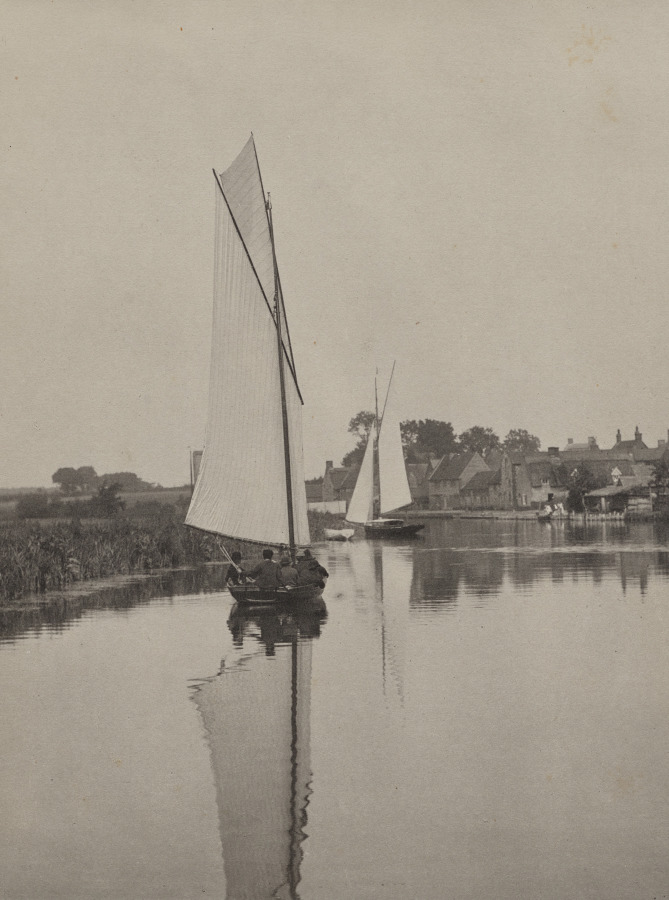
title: The Village of Horning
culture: England , 19th century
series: Life and Landscape on the Norfolk Broads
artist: Peter Henry Emerson (British, 1856–1936)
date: 1886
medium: platinum print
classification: Photograph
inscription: Imprinted on paper sheet adhered to verso of mount: “PLATE V./THE VILLAGE OF HORNING”